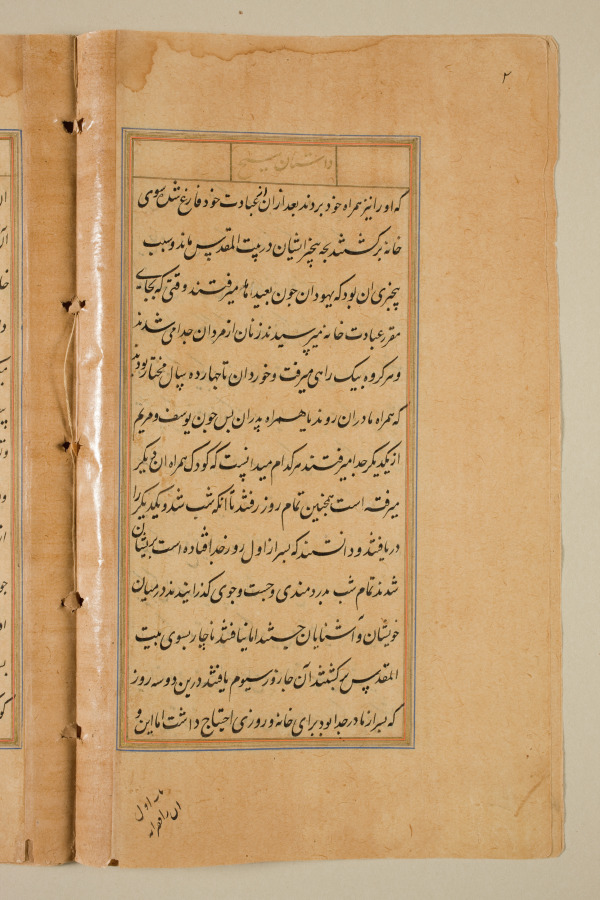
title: Text page from a Mirror of Holiness (Mir’at al-quds) of Father Jerome Xavier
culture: Mughal India, Allahabad, made for Prince Salim (1569–1627)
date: 1602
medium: Ink and gold on paper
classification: Manuscript